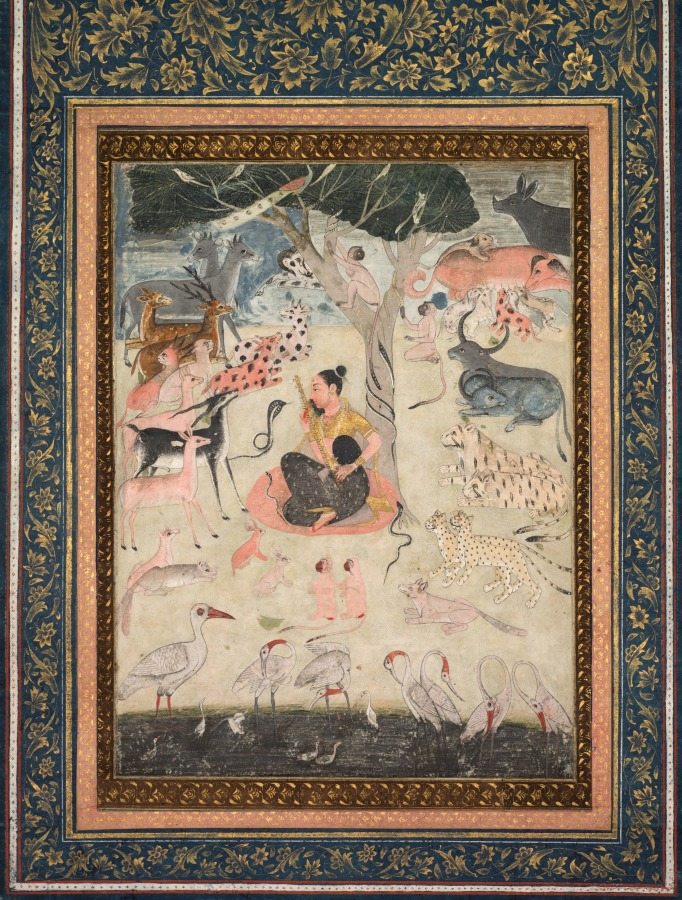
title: The Attractions of Music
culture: Central India, 17th century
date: c. 1680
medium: Gum tempera, ink, and gold on paper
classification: Painting